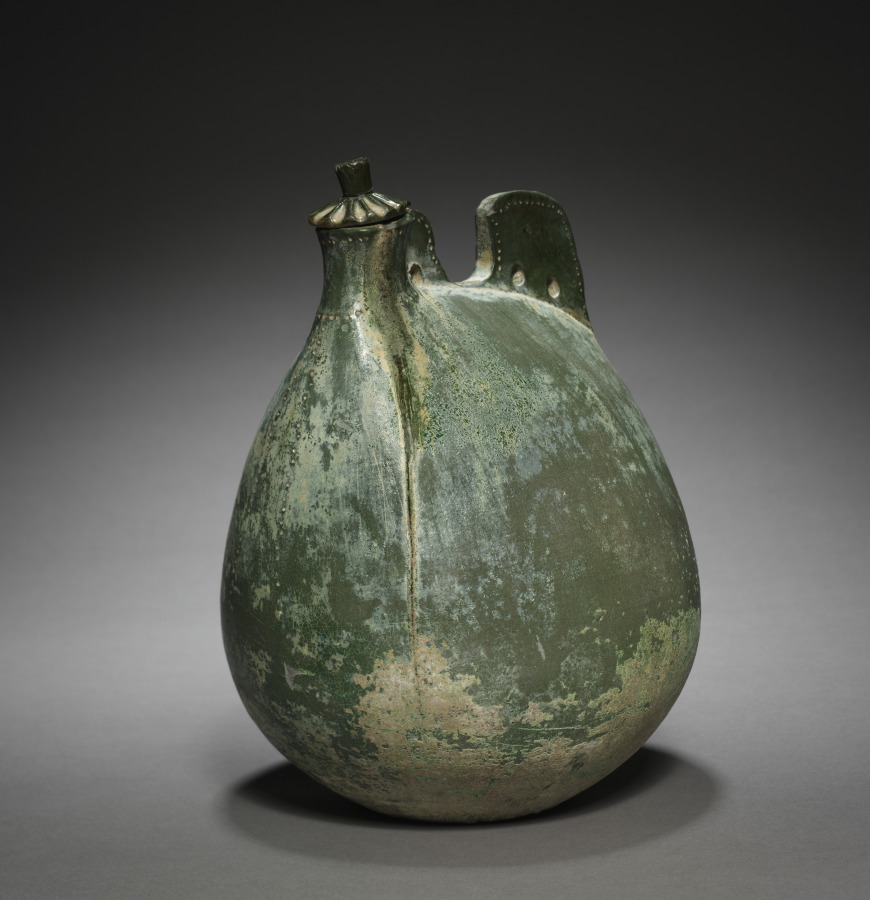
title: Leather Bag-Shaped Flask with Cover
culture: Northeast China, Liao dynasty (916-1125)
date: 916–1125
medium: earthenware with green glaze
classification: Ceramic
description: Flasks like these derive their shapes from leather bags; even the edges are finely rouletted to resemble the seams of sewn leather. These were used by the nomadic Khitan people who established the Liao kingdom in Inner Mongolia, Manchuria, and North China. Such wares represented the Liao adoption of the Tang Chinese ceramic tradition, and yet they expressed ethnic identity and new innovations resulted from the cultural borrowing.